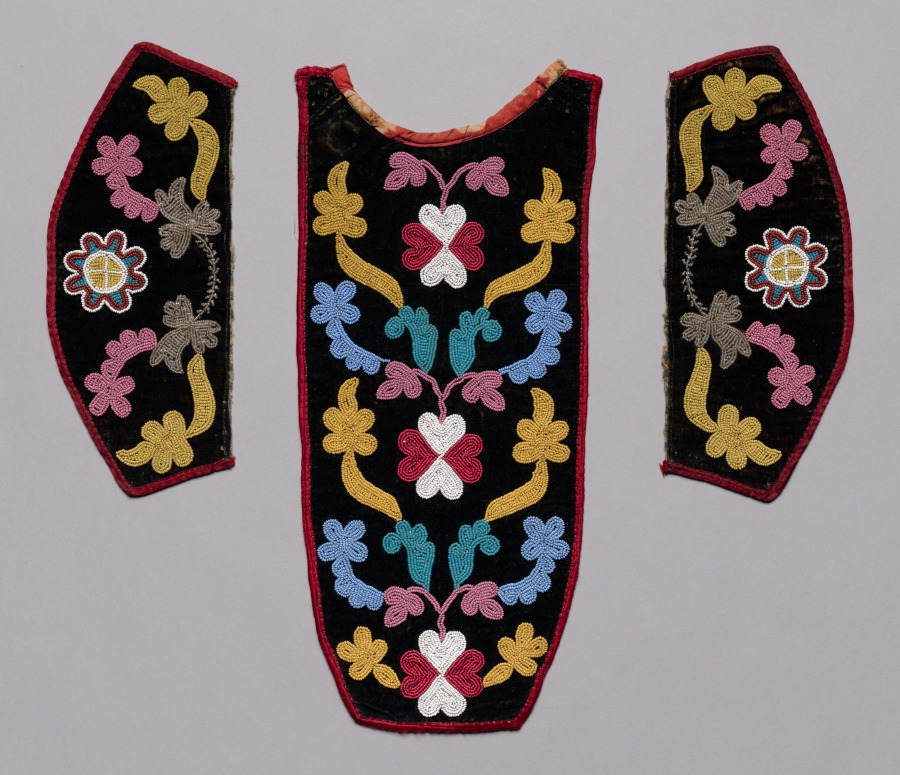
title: Placket and Cuffs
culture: Northeast Woodlands, Great Lakes Region, Anishinaabe (Ojibwe) or Nehiyawak (Cree) People?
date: late 1800s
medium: Velvet, cotton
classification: Garment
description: In the 1800s, native peoples began to use European fabrics to fashion fine formal garments; they favored sturdy cloth, such as velvet and wool broadcloth, which provided support for heavy decorative beadwork that was added by hand. Often the fabric was a dark color, providing dramatic contrast for the multicolored beads. Rather than encrusting the entire garment, beadwork was confined to cuffs, “epaulettes,” bib-like plackets and yokes, rectangular panels sewn to leggings, shirts, and dresses, and the like.